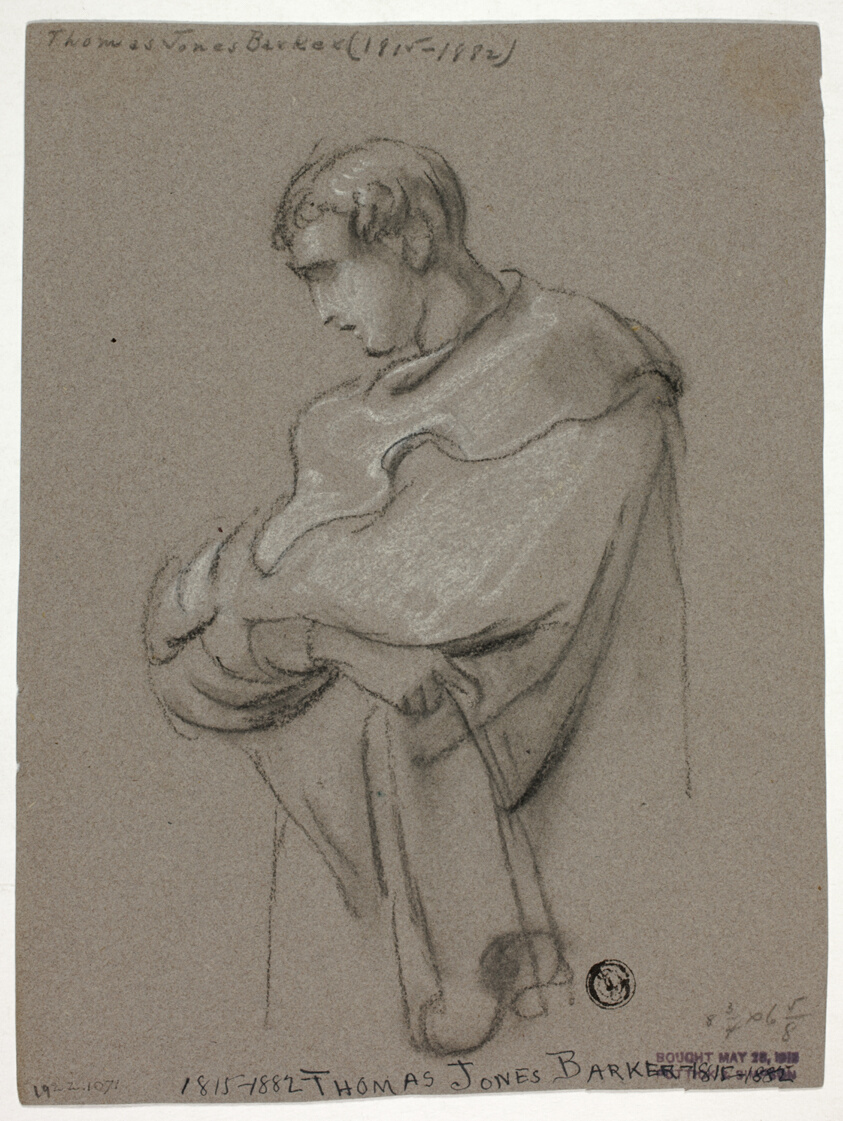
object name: Drawing and Watercolor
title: Bust of a Woman (recto); Draped Figure, Three-Quarter Length (verso)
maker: Thomas Barker (English, 1769-1847); or Thomas Jones Barker (English, 1815-1882)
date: c. 1790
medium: Charcoal, with stumping, heightened with white chalk (recto and verso), on dark pink wove paper with blue fibers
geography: England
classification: drawings (visual works); paper; charcoal; prints and drawing